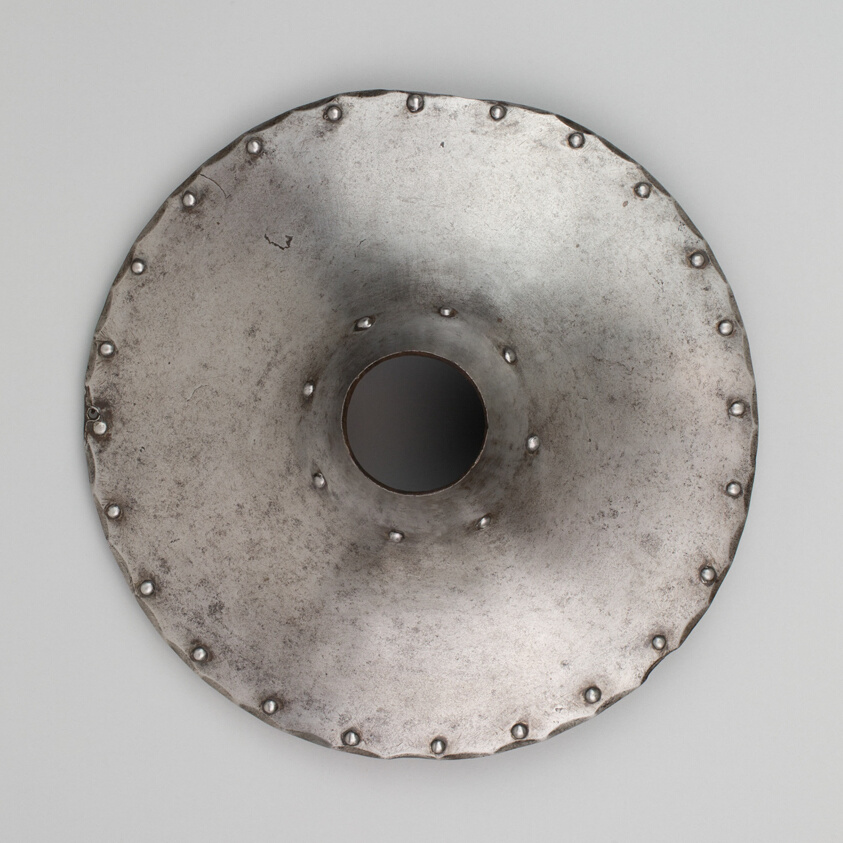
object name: Arms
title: Jousting Lance with Vamplate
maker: German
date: 1400/1500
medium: Steel and wood (linden)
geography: Germany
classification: edged weapon-staff; arms; arms and armor